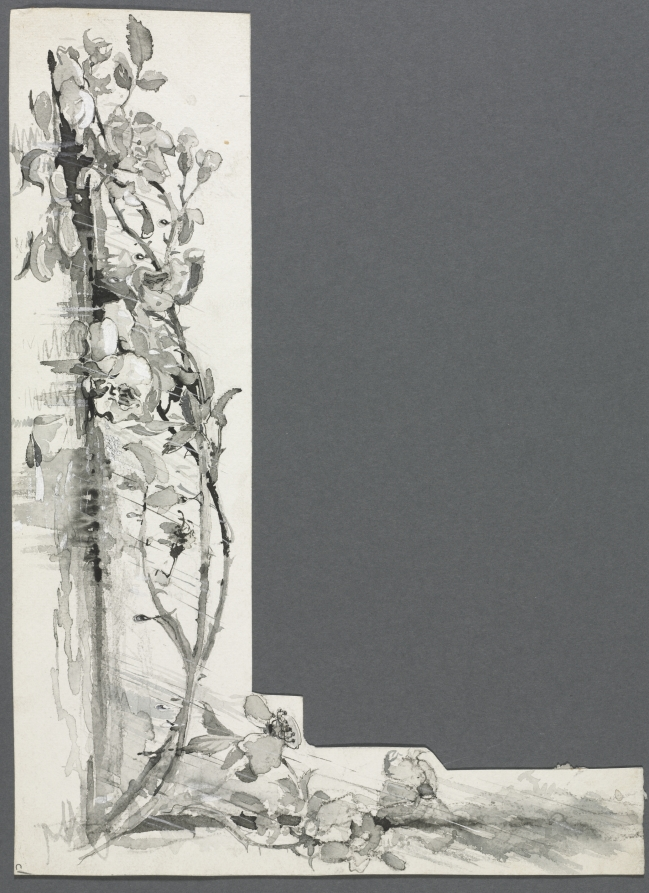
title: Flower Study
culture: America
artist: Harry Fenn (American, 1838/45–1911)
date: c. 1857–1911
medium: wash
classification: Drawing